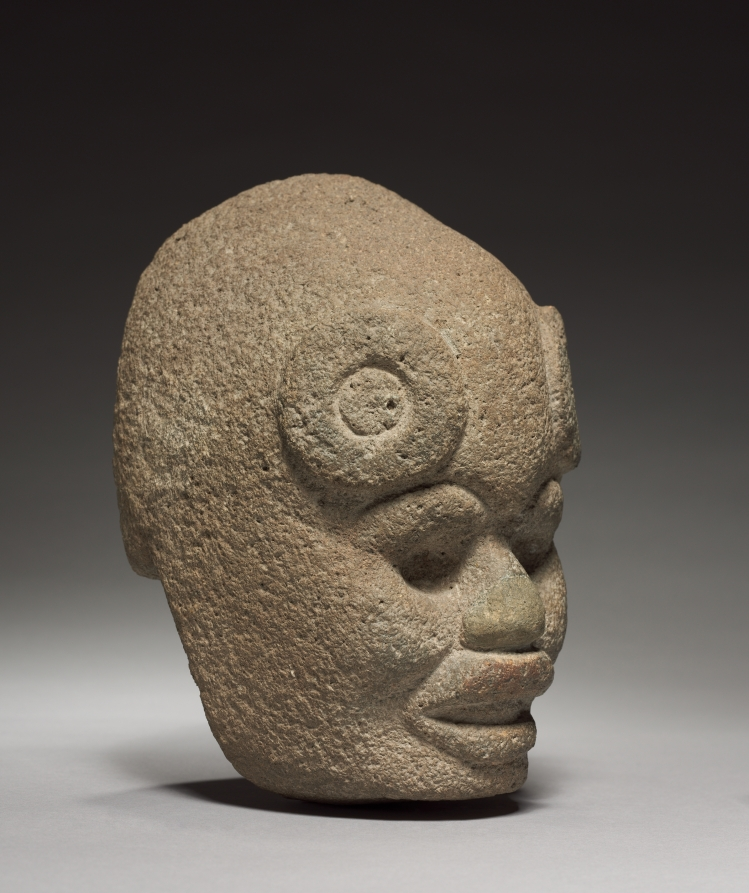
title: Head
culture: Mexico, Classic Veracruz (Totonac or Tajin)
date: 600–1100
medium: stone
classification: Sculpture